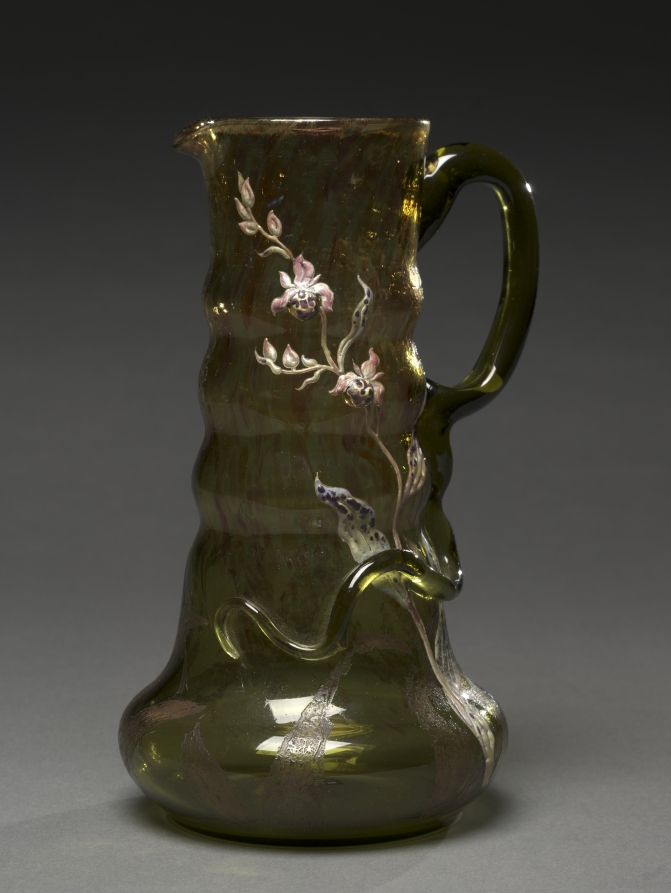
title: Pitcher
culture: France, late 19th Century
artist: Emile Gallé (French, 1846–1904)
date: c. 1890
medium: applied glass and enamel decoration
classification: Glass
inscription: etched on bottom: "Cristallerie/d'Emile Gallé/modele et decor deposes."